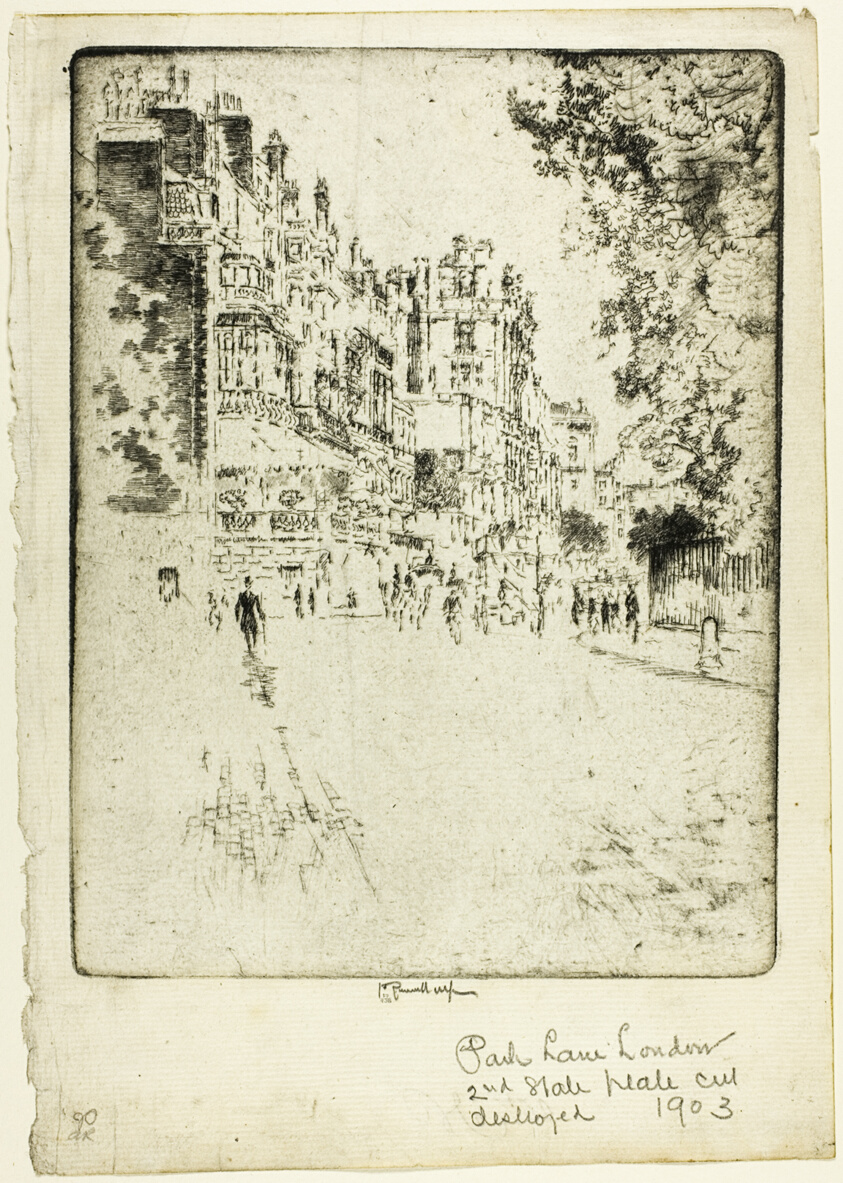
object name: Print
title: Park Lane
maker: Joseph Pennell (American, 1857-1926)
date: 1904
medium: Etching on off-white laid paper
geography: United States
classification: etching; prints and drawing; print